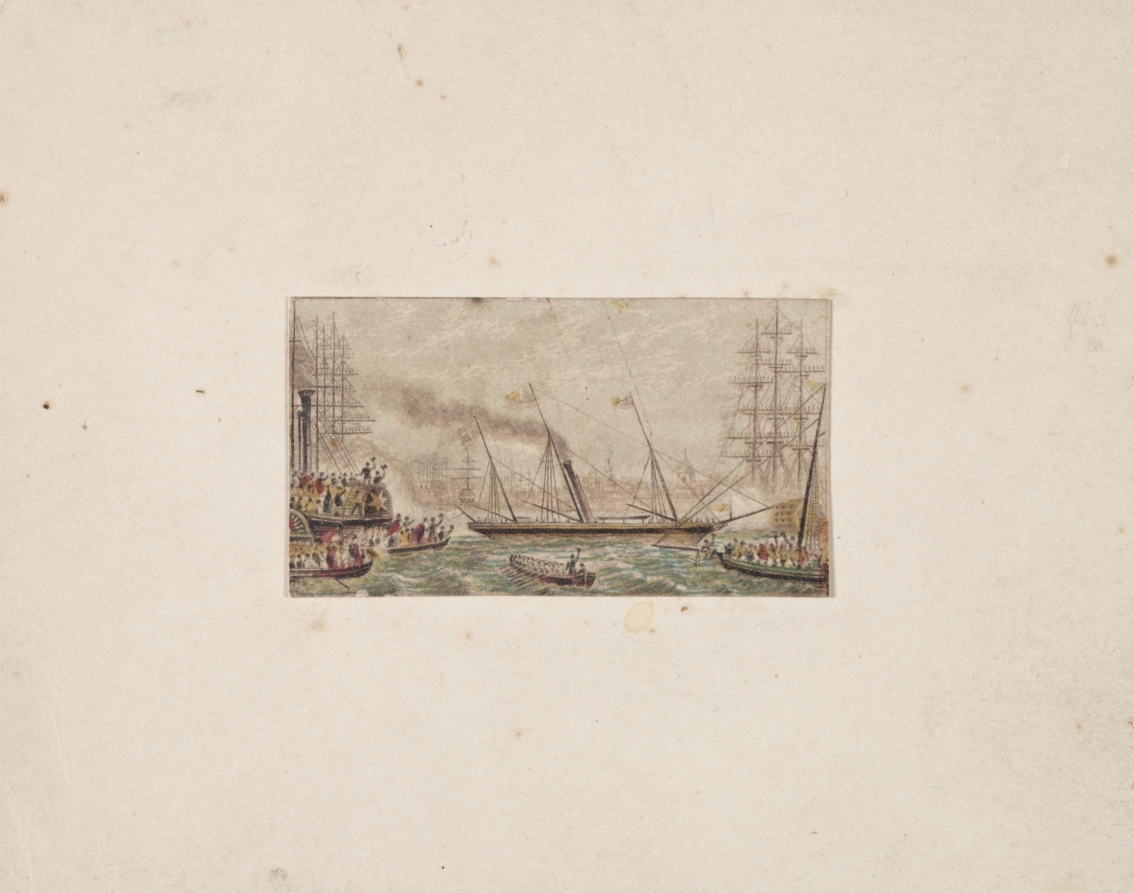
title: Needle-box Print: The Royal Fleet in Kilkenny Bay (?)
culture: England, 19th century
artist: George Baxter (British, 1804–1867)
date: 1850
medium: Baxter process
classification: Print